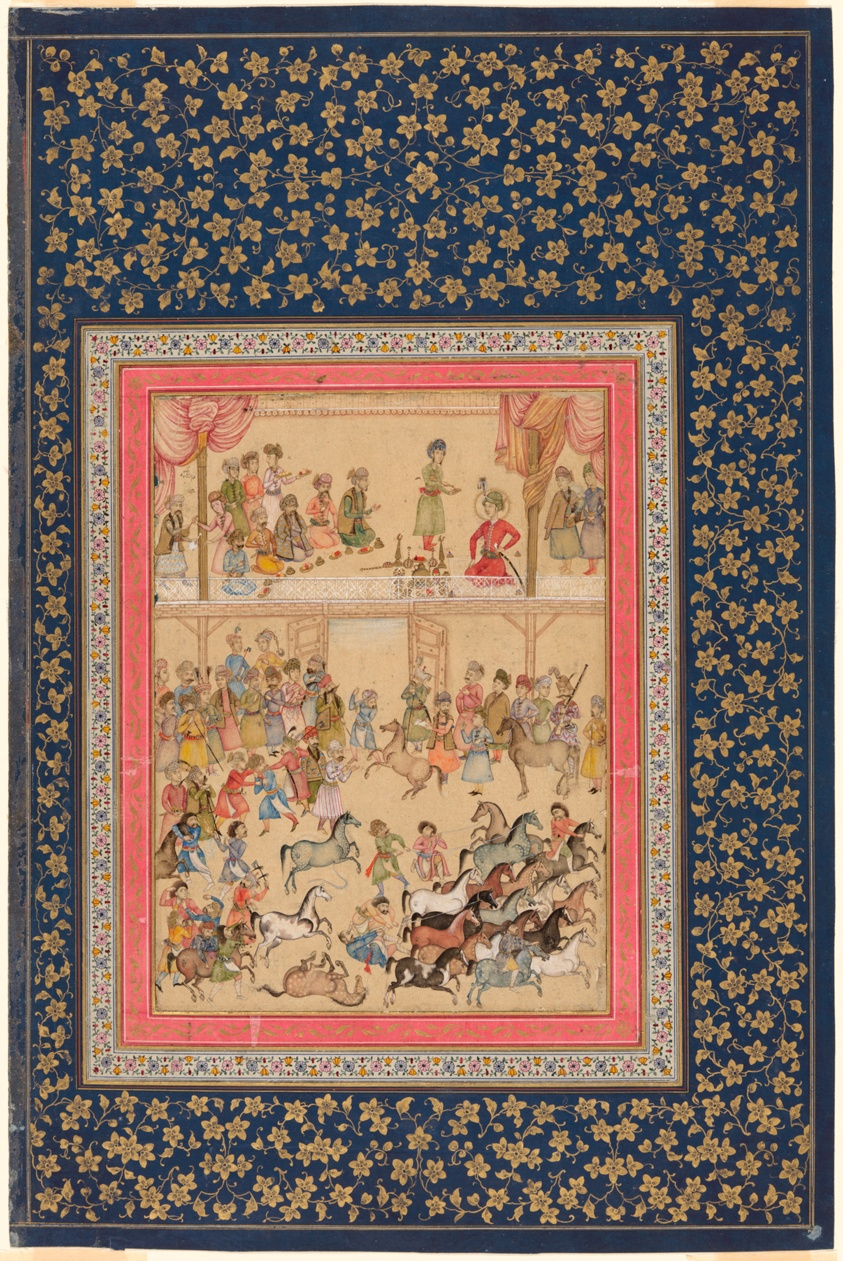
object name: Painting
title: Royal Horse Inspection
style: safavid, Islamic (culture or style), "bizarre" style, iran, isfahan, persian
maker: Iran, probably Isfahan; Aliquli Jabbadar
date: Safavid dynasty (1501–1722), late 17th century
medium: Opaque watercolor and gold on paper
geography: Iran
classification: miniature painting; painting; asian art; iran; islamic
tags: horses, iran, islamic, safavid, shah abbas